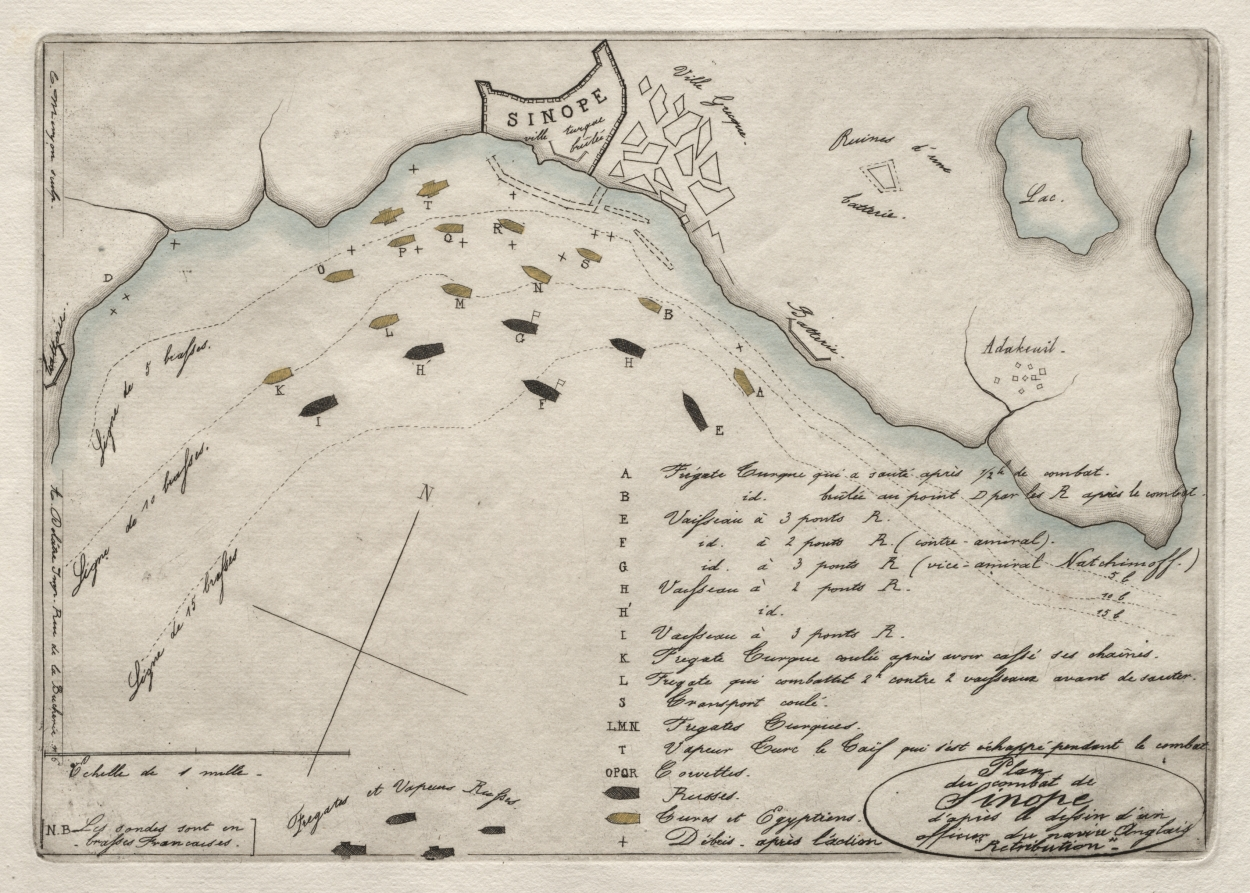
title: Map of the Battle of Sinope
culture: France, 19th century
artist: Charles Meryon (French, 1821–1868)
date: 1853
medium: etching, hand colored with watercolor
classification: Print